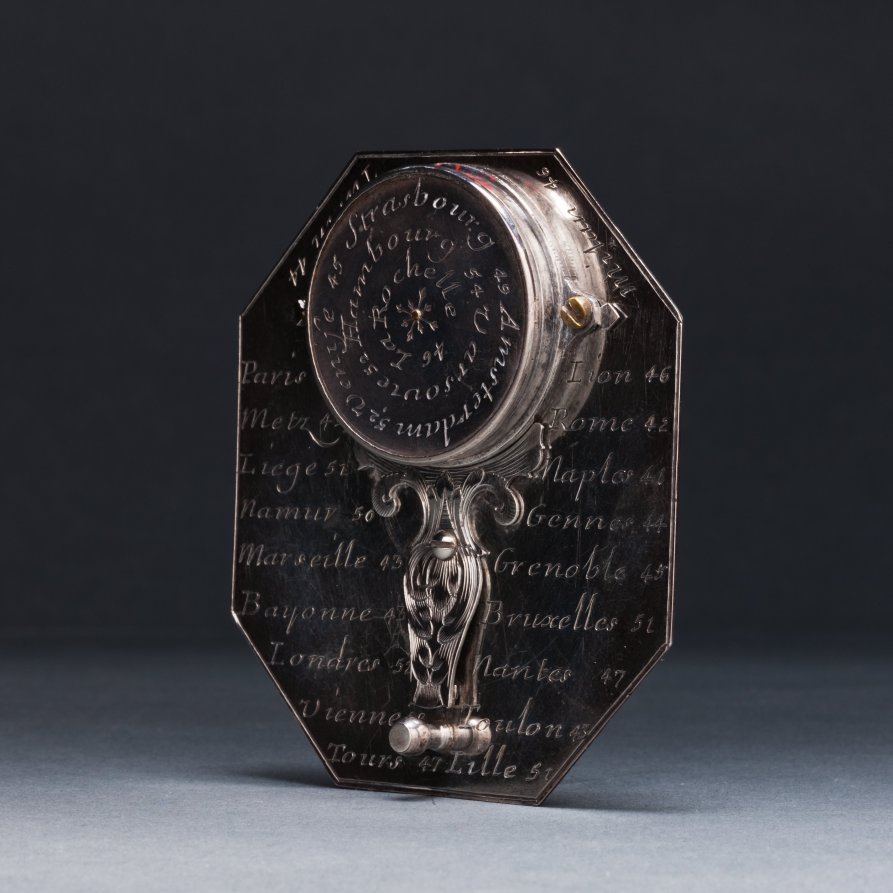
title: Butterfield Sundial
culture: France, 18th century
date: 1700s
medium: silver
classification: Silver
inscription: [Engraved signature above the compass in ribbon band]: "N. BION A Paris"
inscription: [Engraved on the face of the sundial]: “Pour 55° 4-5-6-7-8-9-10-11 50° IIII-V-VI-VII-VIII-IX-X-XI 45° 5-6-7-8-9-10-11 40° -VI-VII-VIII-IX-X-XI'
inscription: [Engraved on the other side]: "Pour 55° -8-7-6-5-4-3-2-1-0 50°-VIII-VII-VI-V-IIII-III-II-I 45°-8-7-6-5-4-3-2-1 40°-VII-VI-V-IIII-III-II-I"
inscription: [Engraved around the compass]: “NORD-OUEST-SUD-EST”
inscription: [Engraved on the back of the sundial]: “Turin 44 Milan 46 Paris 49 Lion 46 Metz 49 Rome 42 Liege 51 Naples 44 Namur 50 Gennes 44 Marseille 43 Grenoble 45 Bayonne 43 Bruxelle 51 Londres 52 Nantes 47 Vienne 48 Toulon 43 Tours 47 Lille 51”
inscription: [Engraved around the back of the compass]: “Venise 45 Strasbourg 49 Amsterdam 52 Hambourg 54 Varsovie 52 La Rochelle 46”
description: Butterfield-type sundials are characterized by their adjustable gnomons, metal flaps that cast a shadow on the dial’s face to indicate the hour, and geographical indices. This sundial has a scale adjustable between latitudes of 40° to 60° north. The latitudes of 26 European towns are engraved on its back for quick reference. With an intricately engraved silver face, it would have functioned as a fashionable traveler’s accessory.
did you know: Butterfield-style sundials were named after Micheal Butterfield, an English scientific and mathematical instrument maker who worked in Paris between 1674 and 1724.